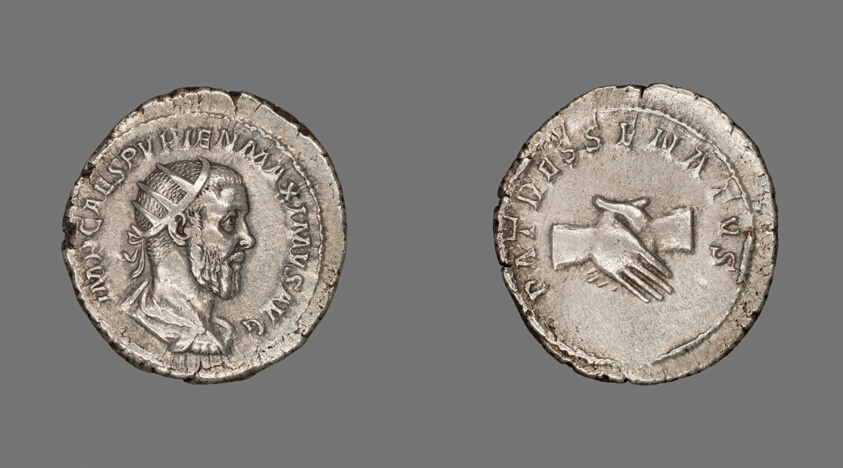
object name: Coin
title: Antoninianus (Coin) Portraying Emperor Pupienus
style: roman (ancient, style or period), ancient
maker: Roman, minted in Rome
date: 238 (April-June), issued by Balbinus and Pupienus, coemperors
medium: Silver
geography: Rome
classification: coin; struck; ancient art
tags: portraits